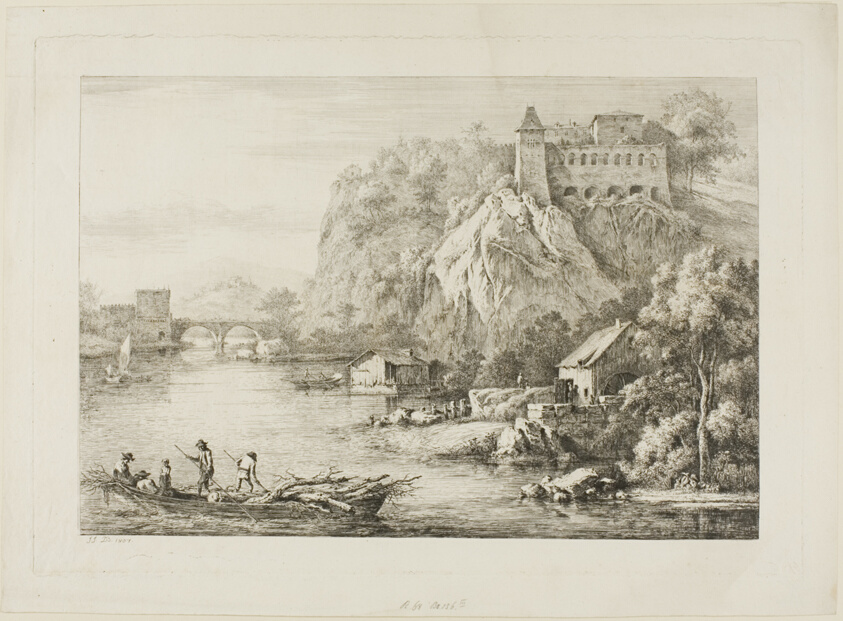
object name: Print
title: View of the Carmes de Caussées at Lyon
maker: Unknown artist (French, 18th-19th centuries)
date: 1807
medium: Etching on paper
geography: France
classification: etching; print; prints and drawing